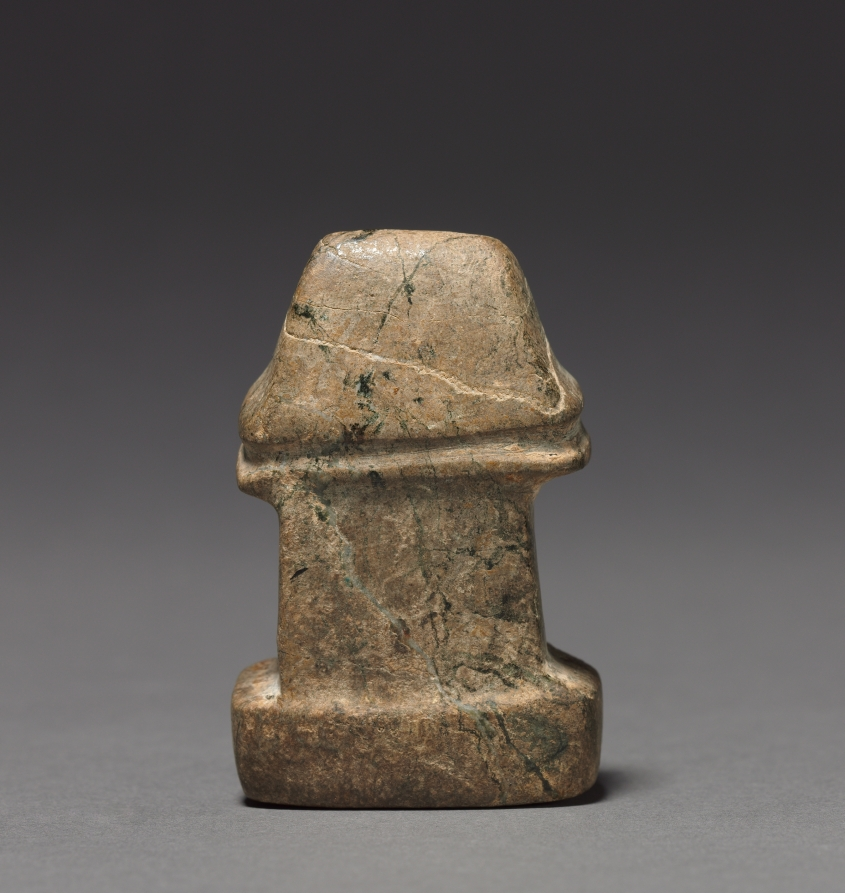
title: Architectural Model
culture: Mesoamerica, Mexico, Guerrero, Mezcala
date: 100 BCE–300 CE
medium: serpentine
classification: Sculpture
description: The Mezcala style takes its name from a river in its homeland, the Guerrero region of western Mexico. The style is known for small-scale stone sculptures including architectural “models” characterized by sleek abstraction. Because comparisons to actual architecture in the Mezcala region are scarce, it is not known whether the models refer to temples, houses, or underground funerary structures.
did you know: The Mezcala style is only identified in stone sculpture.